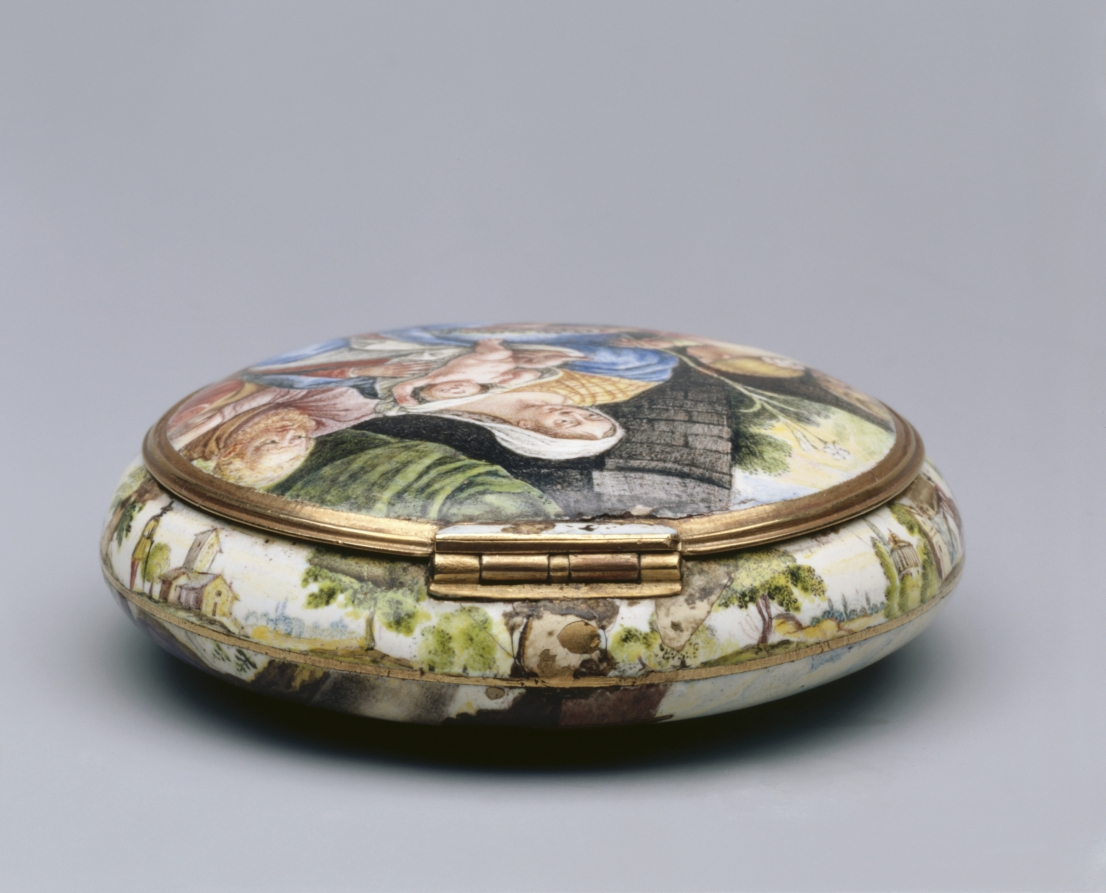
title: Watchcase (Boîtier de montre)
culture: France, 17th century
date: c. 1640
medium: gold and enamel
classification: Jewelry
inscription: [engraved on the rim]: "B8"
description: In the 1630s, the practice of painting with enamel on metal became a means for French miniature painters to achieve a more richly colored, durable product. Previously miniatures were painted with watercolor on vellum, a material made from animal skin. This case would have originally held a watch, but was later transformed into a simple box through the removal of the watch mechanism and ring. This watch case is richly painted inside and out with miniatures modeled after well-known religiously allegorical works.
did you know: Inspiration for the box’s miniatures was drawn from works by Peter Paul Rubens’ The Holy Family with Saints John the Baptist and Elizabeth (1615) (back panel) and Nicolas Cochin (interior base).